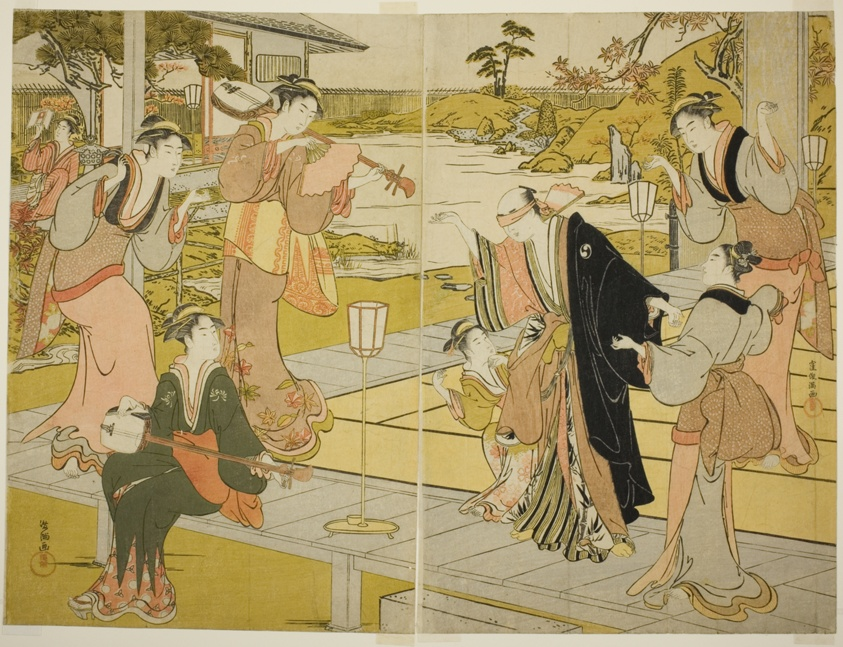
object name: Print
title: Oboshi Yuranosuke at the Ichiriki Teahouse, from scene VII in the Storehouse of Loyal Retainers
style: Japanese (culture or style)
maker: Kubo Shunman (Japanese, 1757–1820)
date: c. 1785/89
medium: Color woodblock print; right and center sheets of oban triptych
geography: Japan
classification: woodblock print; print; asian art